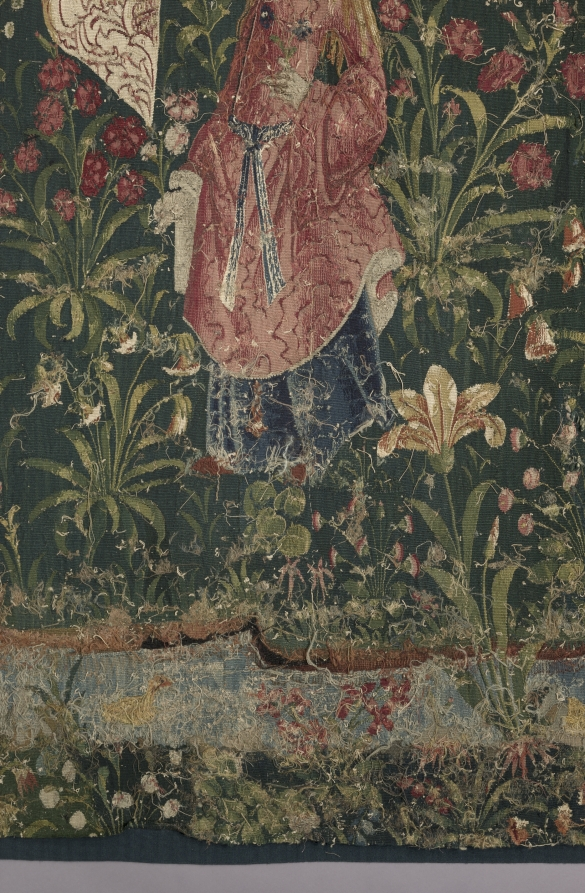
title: The Triumph of Eternity (from Chateau de Chaumont set)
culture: France, Lyon(?), early 16th century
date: 1512–15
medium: silk and wool; tapestry weave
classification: Tapestry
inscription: French verse in Gothic letters translates as follows: "Nothing triumphs by right authority, Unless it be conducted by Eternity. Nothing is permanent beneath the firmament, But above us triumphs Eternity."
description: The Triumph of Eternity is represented by the Coronation of the Virgin. Dressed in crimson velvet with an opulent brocaded velvet shawl, the Virgin is seated in the center as two angels hold a crown over her head. Five musical angels surround her playing an organ, recorder, straight cornetto, harp, and lute, while another sings from an open music book. The scenes in the set display a conservative style in which the figures are placed in shallow landscapes, thereby ignoring pictorial innovations for depicting space and mass. The verse in Old French at the top states: Nothing triumphing by due authority Remains permanent and durable. Nothing is permanent under the heavens, But above, eternity triumphs.